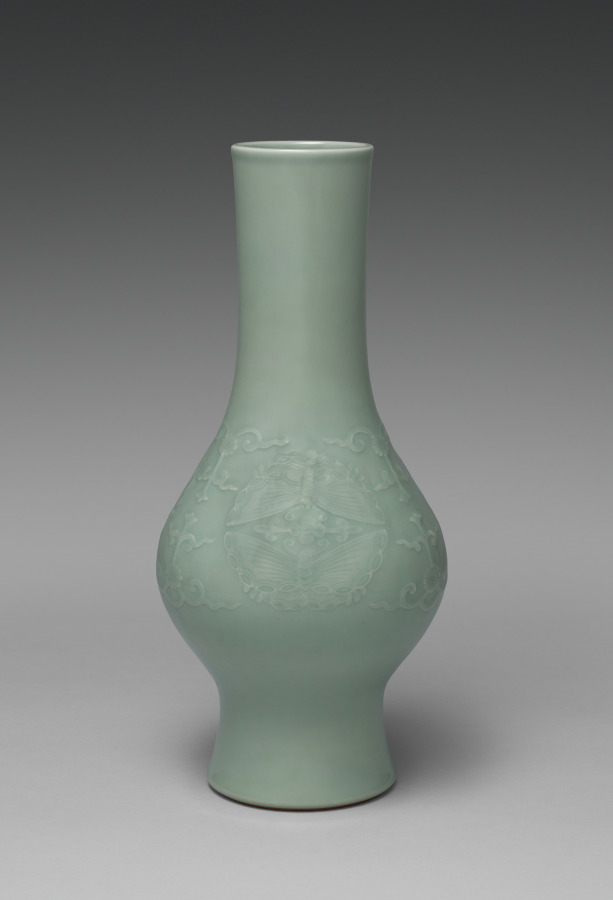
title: Flower Vase with Butterflies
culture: Japan, Meiji period (1868–1912)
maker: Seifū Yohei III (Japanese, 1851–1914)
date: 1907–14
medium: Porcelain with green glaze and carved and molded design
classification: Ceramic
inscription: 清風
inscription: 【印】 帝室技芸員。 【印】 清風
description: This flower vase has two pairs of butterflies forming low-relief roundels, one on each side. The butterflies face each other, one positioned above and the other below, their antennae curling up to a centrally placed floral motif. In the spaces between the pairs of insects, additional raised floral designs are set within vinelike extensions reminiscent of open metalwork banners and canopy adornments in Buddhist temples. The lip and the foot of the vase remain white, and the thinning of the green glaze within the higher-relief portions of the body decoration accentuates the designs. This work, like the sweets bowl CMA 2022.232, has a box lid attribution to Yohei III by Yohei IV. His inscription is dated to the autumn of 1919.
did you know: The box identifies the vase as in the hisokuyō (Chinese mise yao 秘色窯), or “mysterious color ware,” style.